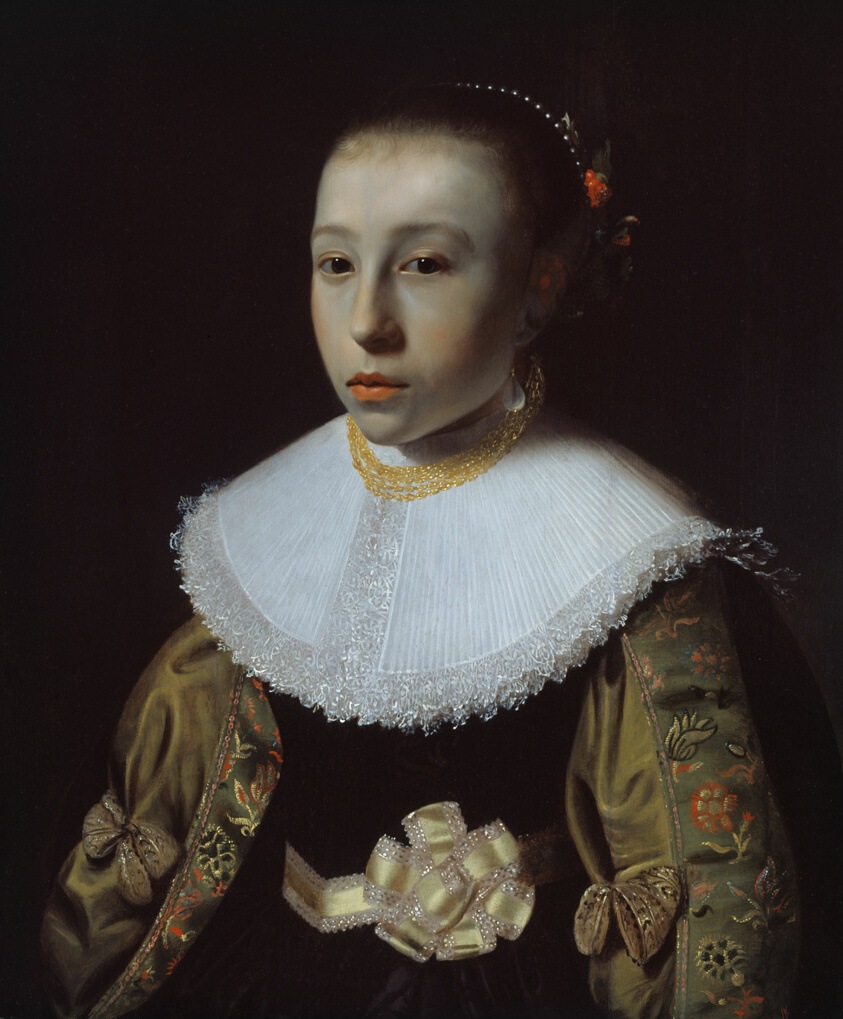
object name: Painting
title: Portrait of a Young Girl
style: 17th Century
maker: Attributed to Pieter Dubordieu (Dutch, c. 1609–after 1678)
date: 1633–35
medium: Oil on panel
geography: Netherlands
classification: oil on panel; dutch; oil paintings (visual works); paint; portrait; painting; european painting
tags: portraits: female subject, dutch, dresses, jewelry, luxury, girl, portraits, portrait